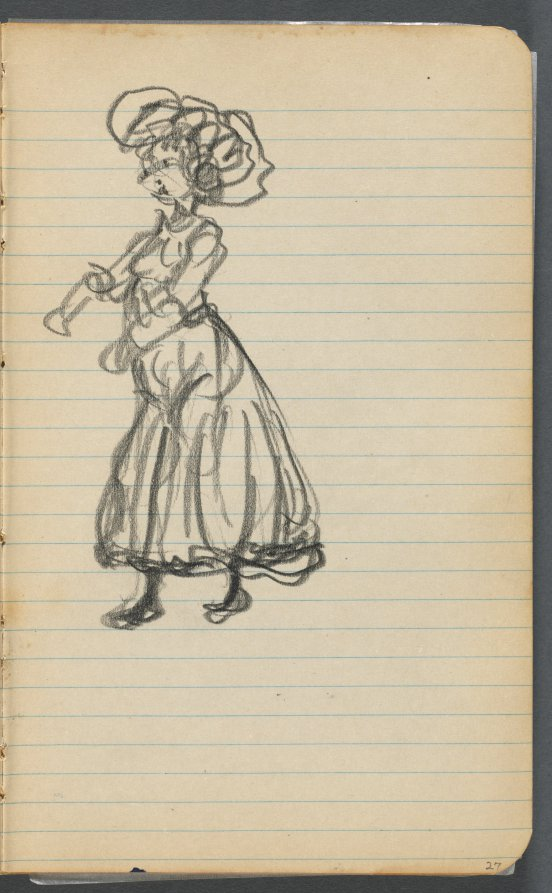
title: Sketchbook, page 027: Female Figure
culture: America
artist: Maurice Prendergast (American, born Newfoundland [now Canada], 1858–1924)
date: 1905–10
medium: graphite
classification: Bound Volume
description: This sketchbook contains 69 pages of drawings, a diary largely devoted to the state of the artist's health, and a three-page discourse on the nature of genius and ideas.